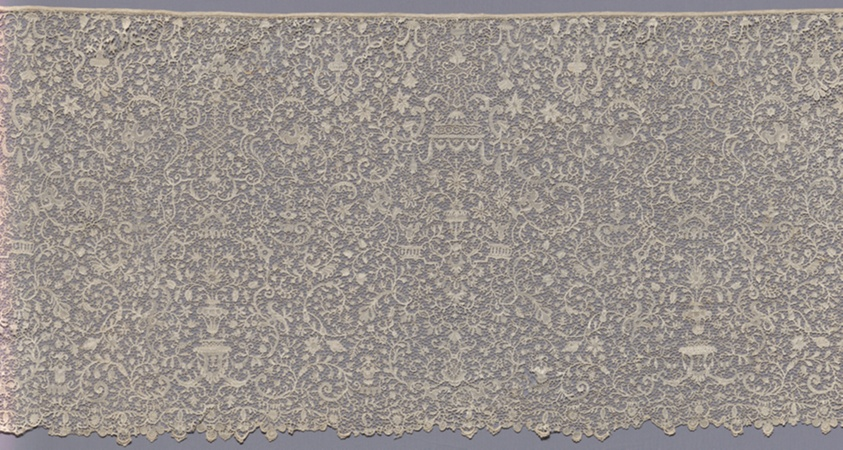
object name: Textile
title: Flounce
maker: France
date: c. 1700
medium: Linen, needle lace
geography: France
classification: textile; lace - needle